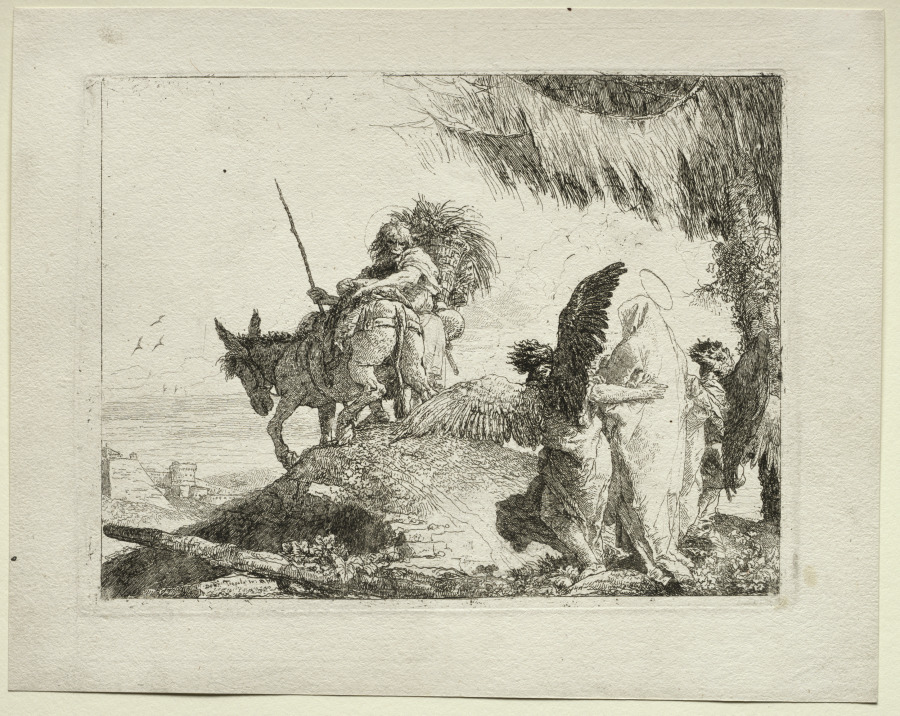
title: The Flight into Egypt: The Flight with the Madonna at Right Supported by Angels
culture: Italy, 18th century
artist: Giovanni Domenico Tiepolo (Italian, 1727–1804)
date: 1750–53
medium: etching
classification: Print